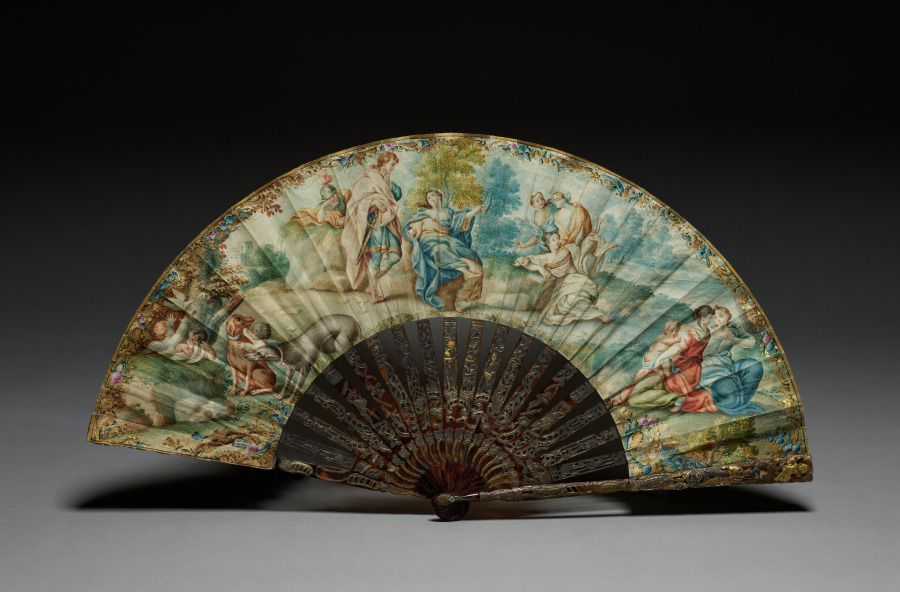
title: Folding Fan: Mythological Scene with Diana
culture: Italy, Rome(?), 18th century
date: c. 1730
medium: tortoise-shell sticks, painted skin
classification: Miscellaneous